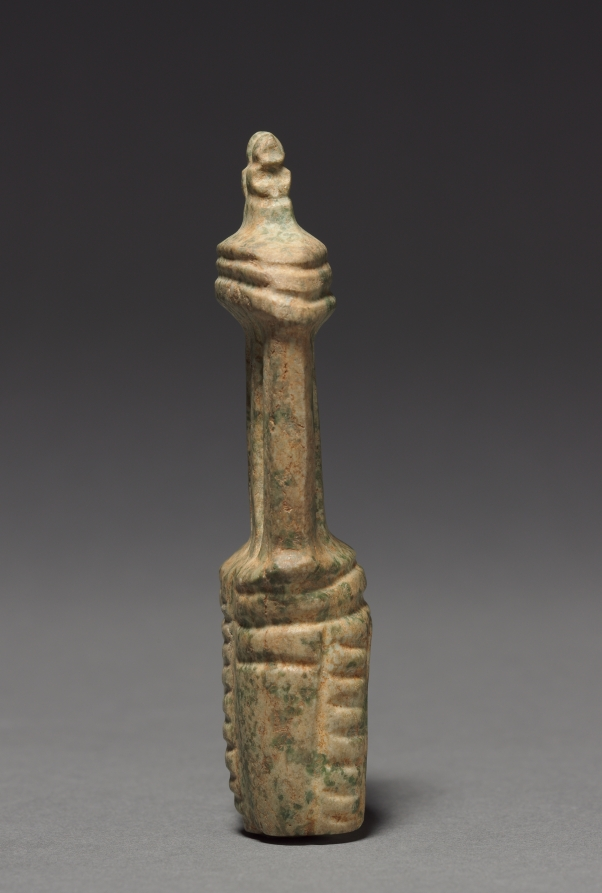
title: Architectural Model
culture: Mesoamerica, Mexico, Guerrero, Mezcala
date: 100 BCE–300 CE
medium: serpentine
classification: Sculpture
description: The Mezcala style takes its name from a river in its homeland, the Guerrero region of western Mexico. The style is known for small-scale stone sculptures including architectural “models” characterized by sleek abstraction. Because comparisons to actual architecture in the Mezcala region are scarce, it is not known whether the models refer to temples, houses, or underground funerary structures.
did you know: Mezcala architectural models reportedly come from burials, but few have been scientifically excavated.